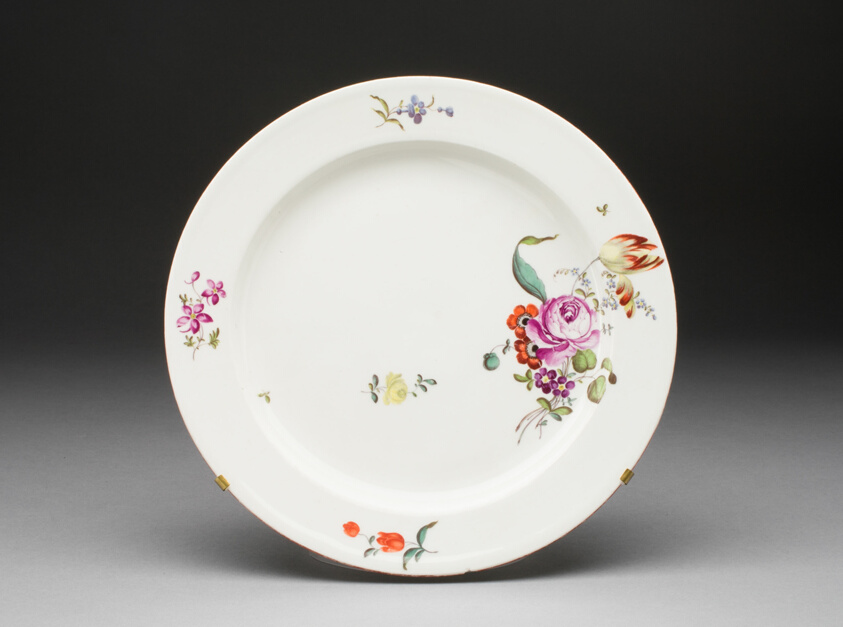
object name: Ceramics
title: Plate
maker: Amsterdam, Netherlands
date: Early 19th century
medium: Porcelain with polychrome enamel decoration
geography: Amsterdam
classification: plate (general, dish); dish (vessel); european decorative arts; ceramics